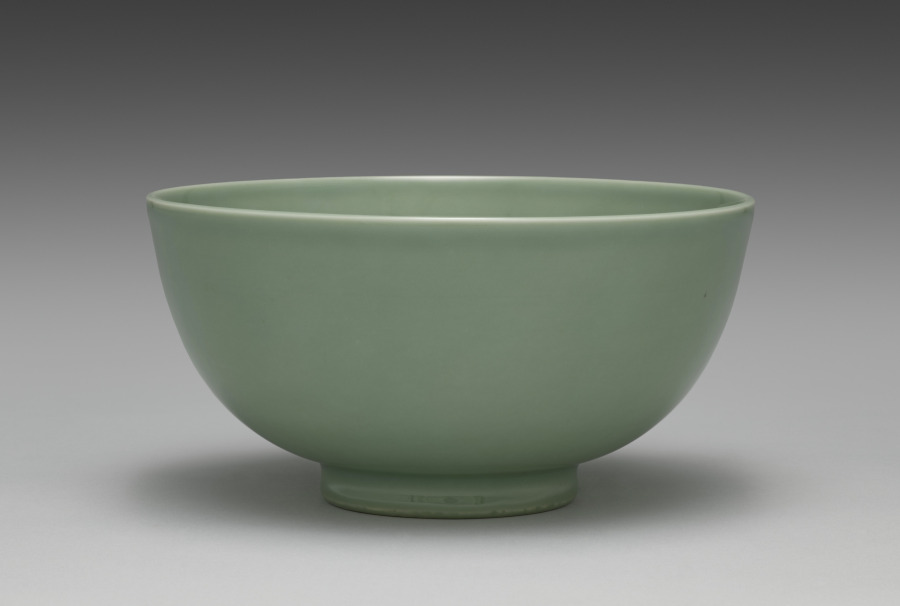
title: Sweets Bowl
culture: Japan, Meiji period (1868–1912)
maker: Seifū Yohei III (Japanese, 1851–1914)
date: 1893–1914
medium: Porcelain with green glaze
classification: Ceramic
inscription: 彫銘：清風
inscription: 共箱の箱書：（蓋裏）秘色窯菓子鉢 三世清風晟山作（印：帝室技藝員）襲（袭）四世清風與平識之（印：清風）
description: The box for this sweets bowl has an attestation by Yohei IV that it is a work by Yohei III and in the hisokuyō (C. mise yao), or “mysterious color ware,” style. In fact, as actual examples of mise ware were unknown in Yohei III’s time, he would have associated the color with the green-glazed ceramics of kilns at Longquan, also in Zhejiang Province, produced during the Yuan dynasty.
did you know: Many ceramics created by the Seifū Studio refer to and emulate Chinese ceramics in form and glazing.